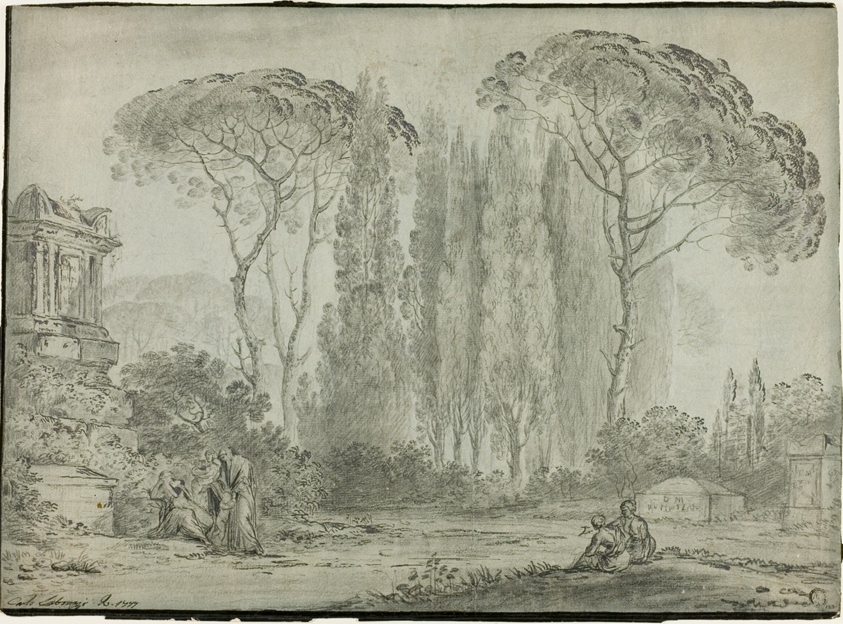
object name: Drawing and Watercolor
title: Mourners in a Graveyard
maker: Carlo Labruzzi (Italian, 1748-1818)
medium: Black crayon and black chalk, with stumping and touches of pen and black ink, heightened with lead white (discolored), on ivory laid paper prepared with a blue ground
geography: Italy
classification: crayon; graphite; drawings (visual works); prints and drawing